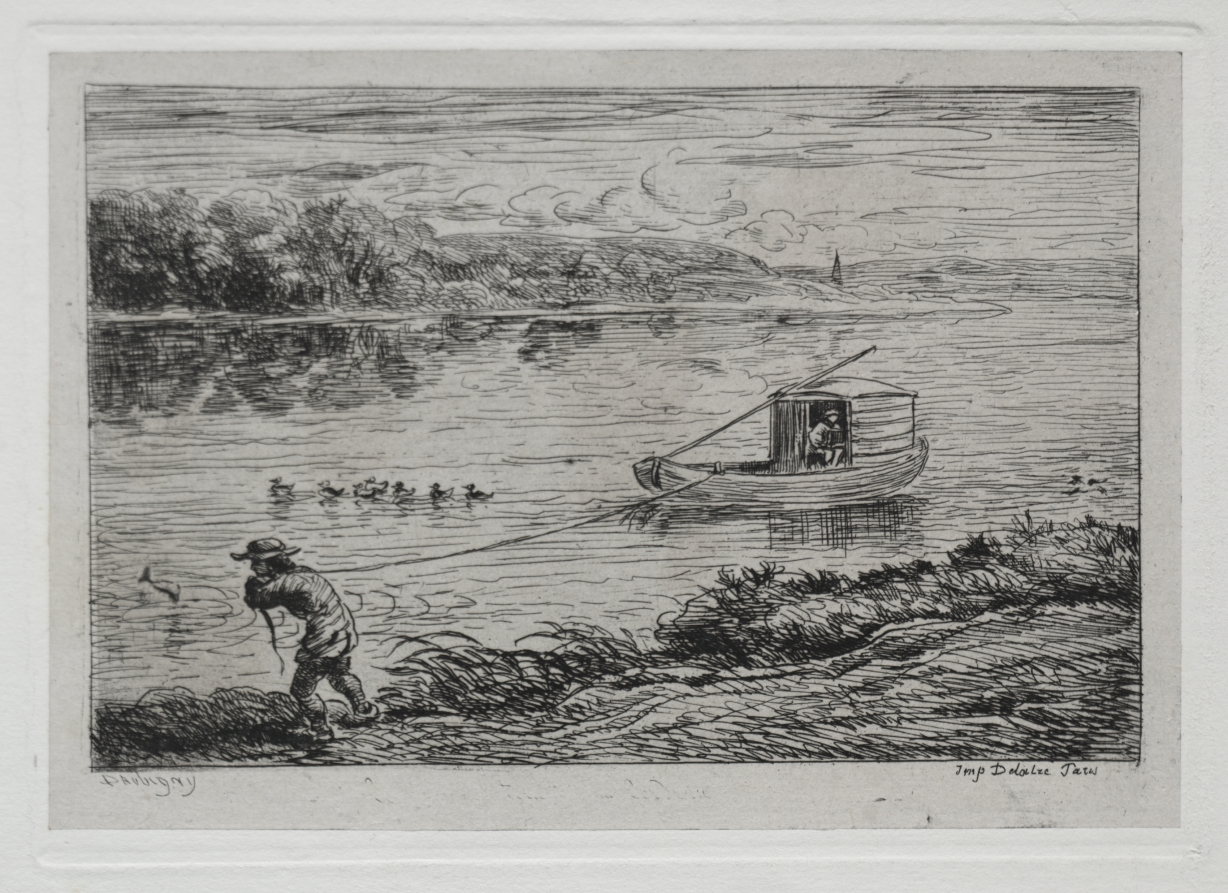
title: The Boat Trip: Cabin Boy Hauling the Tow-Rope or Hauling by Rope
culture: France, 19th century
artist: Charles François Daubigny (French, 1817–1878)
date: 1861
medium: etching with chine collé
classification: Portfolio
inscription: lower left corner, in graphite: L. D. 103